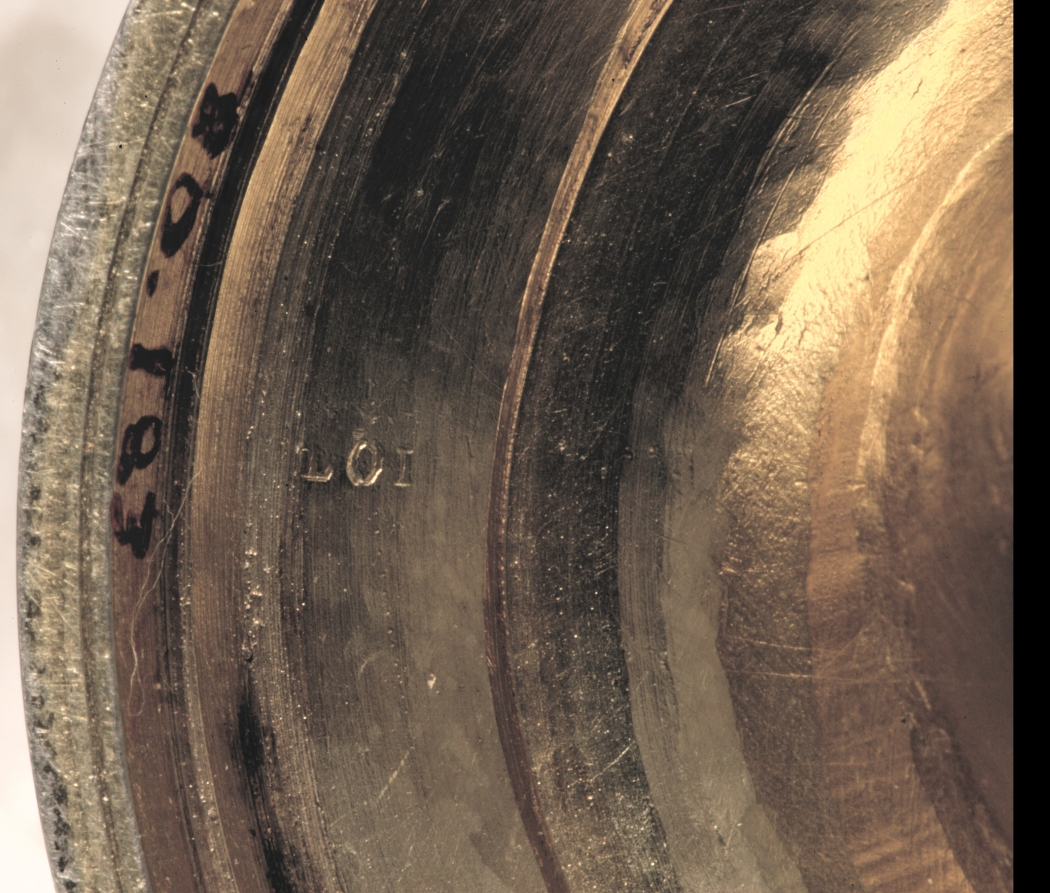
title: Ewer (aiguière)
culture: France, 19th century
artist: Jean Baptiste Claude Odiot (French)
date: c. 1817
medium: silver gilt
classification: Silver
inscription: [Excise mark for medium-sized work, Paris, 1809-1819, on edge of base]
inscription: [Two maker's marks of Jean-Baptiste-Claude Odiot after the Revolution, inside foot]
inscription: [Official assay mark for first standard silver, Paris, 1809-1819, near exterior upper rim]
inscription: [Applied coat of arms of the count Alfred de la Chapelle, Seigneur of Morton and Beaulieu, Périgord “accolé” with an alternate version of de la Chapelle, exterior of foot]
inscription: [Struck twice, interior foot]: "ODIOT"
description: Jean-Baptiste-Claude Odiot’s reputation stretched internationally. Commissioned by Russian count Nikolei Demidoff, this ewer was one part of an extensive silver dinner service. Decorated with motifs of classical antiquity, this object’s Greco-Roman silhouette, grape vine frieze, raised mythological figures, and sinuous swan’s neck handle were likely inspired by the designs of Charles Percier and Pierre-François Fontaine, architects of Napoleon I.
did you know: The coat of arms on the foot of this ewer belongs to the count Alfred de la Chapelle who owned this silver dinner service during the second half of the 19th century.